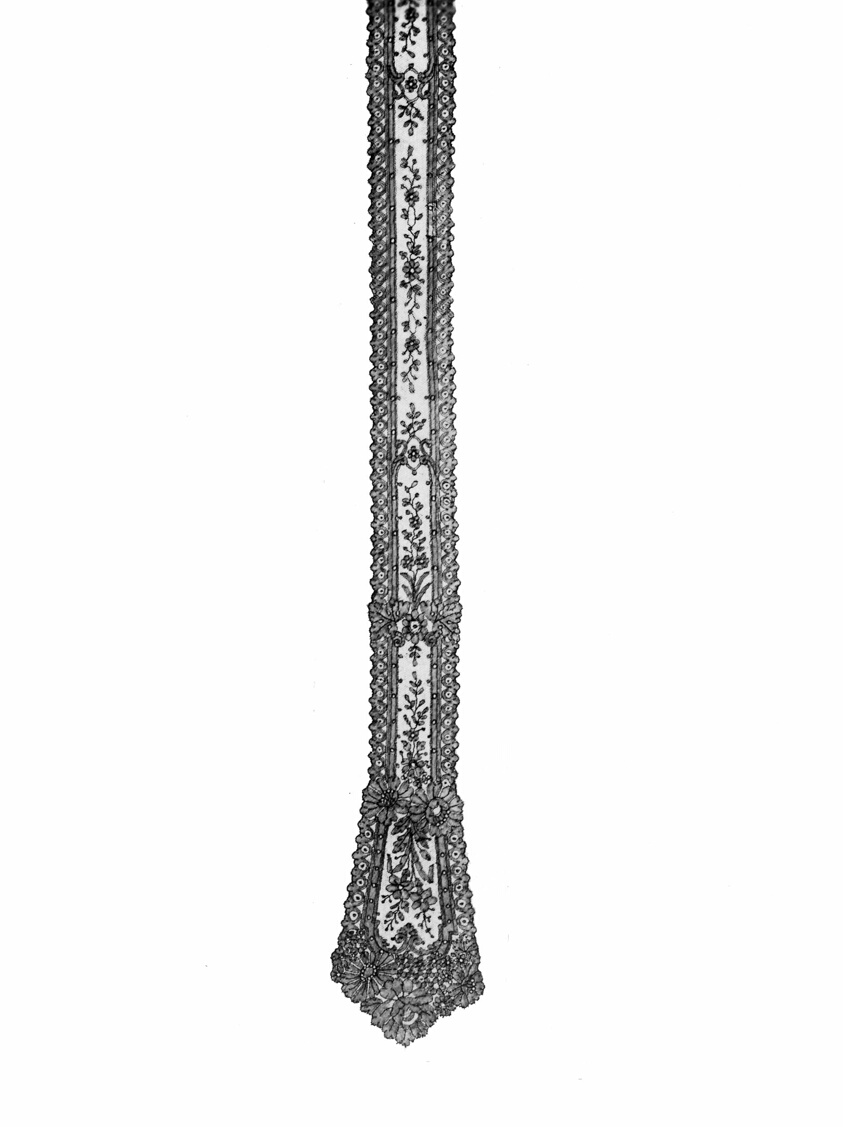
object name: Costume and Accessories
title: Pair of Lappets (Joined)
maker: France, probably Bayeux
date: 1860s/70s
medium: Silk, bobbin straight lace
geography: France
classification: costume accessory; lace - bobbin; textile; costume; costume accessory - headdress; costume accessory worn above the waist